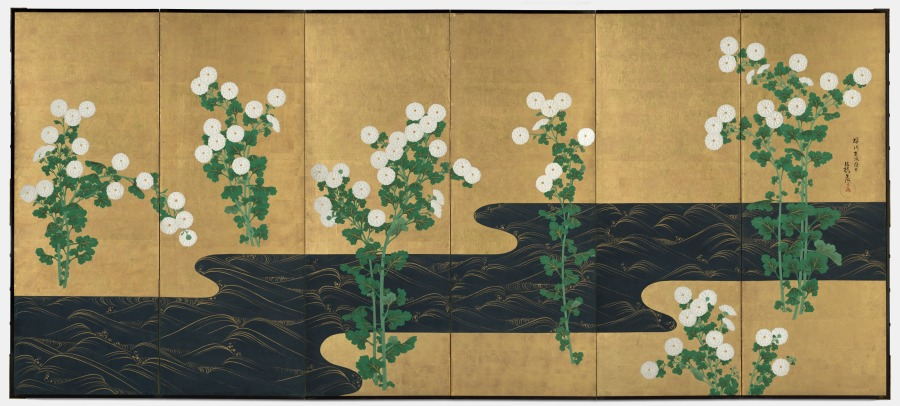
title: Chrysanthemums by a Stream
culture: Japan, Edo period (1615–1868)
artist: possibly by Ogata Kōrin (Japanese, 1658–1716)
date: c. 1715–30 or later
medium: Pair of six-panel folding screens; ink and color on gilded paper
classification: Painting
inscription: 蝉川末派隠士 法橋光琳 方祝（朱丸印）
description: These screens recall a painting style so closely identified with Ogata Kōrin (1658–1716) that it is called Rinpa, or “Rin School,” after the ideograph “rin” in his name. The highly stylized background accentuates floral groupings that have been groomed so as to appear utterly artificial, like the synthetic arrangements available today. Kōrin's genius derived in large measure from natural phenomena painstakingly observed and then manipulated to create compositions of startling refinement and sparkling isolation. This process may have grown out of Kōrin's early immersion in the family textile business, a medium that encourages such dramatic distillations of form: the stream's gold-crested waves bring to mind traditional kimono robe designs of Kōrin's era. Works with the signature seen on this painting, including a style name, or persona suggested to Kōrin by his brother Kenzan (1663–1743), are sometimes considered to have been produced either in the last year of his life, when he was very ill, or after his death. In both scenarios, the lion’s share of the work would have been done by studio assistants, but little is truly known of his studio practice. Given the regularity of the gold waves on the stream, and the tension in the arrangement of the chrysanthemums, it is also possible that the screens were made in emulation of Kōrin's designs by a later artist.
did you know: The signature used on these screens can perhaps indicate paintings made in the last year of the artist's life, or works completed by his studio after his death.